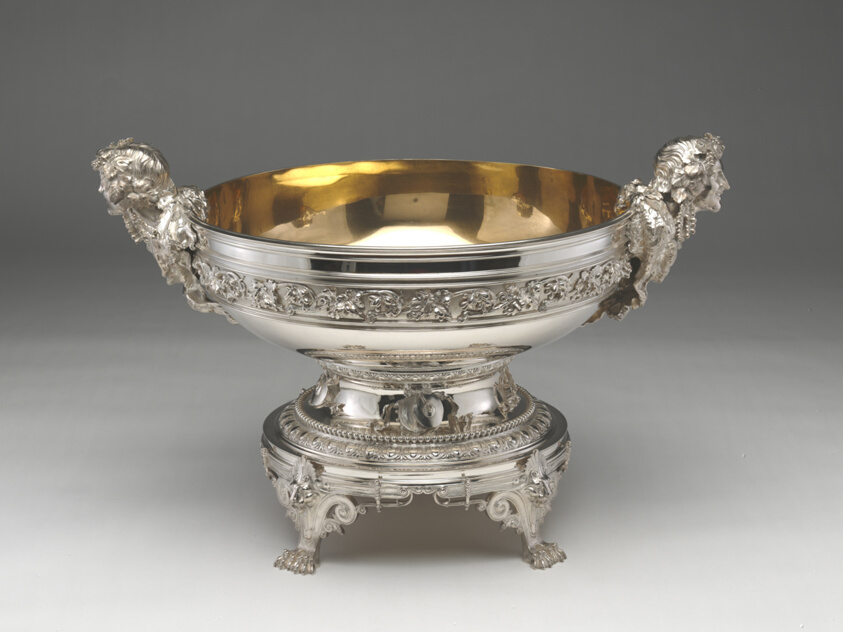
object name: Metalwork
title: Punch Bowl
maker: Chased by Eugene J. Soligny (American, c. 1833–1901); Tiffany and Company (American, founded 1837); New York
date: 1873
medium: Silver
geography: New York City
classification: punch bowl; silver; american decorative arts; american arts; decorative arts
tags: dining, drinking